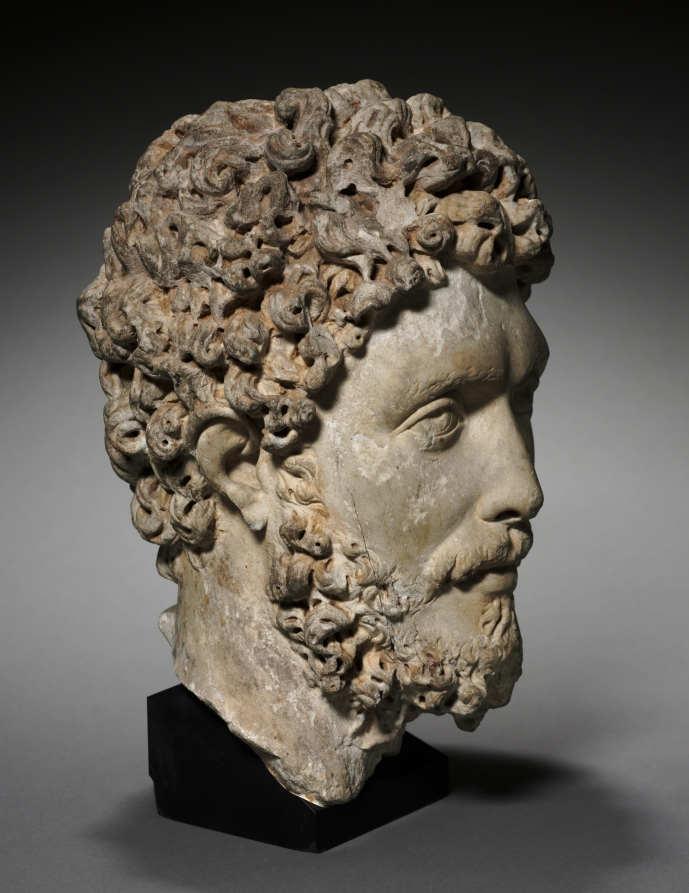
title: Portrait Head of a Noble or Official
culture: Italy, Roman, Antonine period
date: 175–200 CE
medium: marble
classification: Sculpture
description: A nobleman or government official is likely depicted in this portrait of a curly-haired man with a full beard. These features, together with drilled pupils and irises on the eyes, typically do not appear in Roman sculpture prior to the reign of Hadrian (AD 117–38), an admirer of Greek culture. Deeply carved beards and curls remain popular in portraiture throughout (and beyond) the Antonine period (AD 138–92), when this sculpture was probably made.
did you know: When acquired, this portrait was thought to depict Lucius Verus, co-emperor with Marcus Aurelius (reigned AD 161–69).